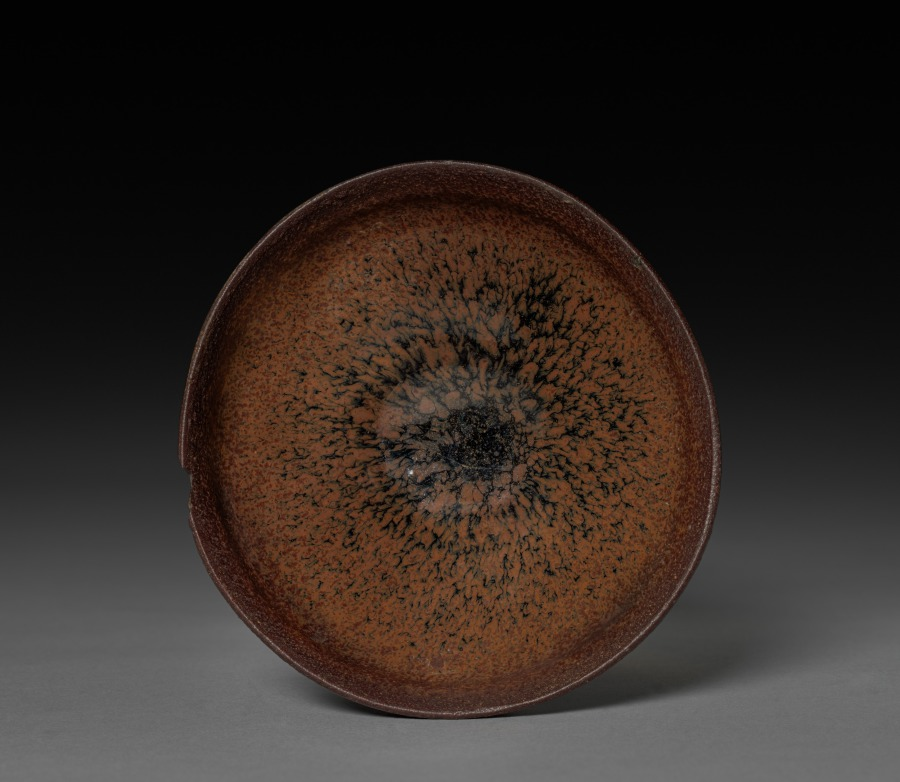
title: Tea Bowl: Jian ware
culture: China, near Shui ch'i, Song dynasty (960-1279)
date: 960–1279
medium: stoneware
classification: Ceramic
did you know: Jian ware was very popular with the tea cultures in China and Japan.